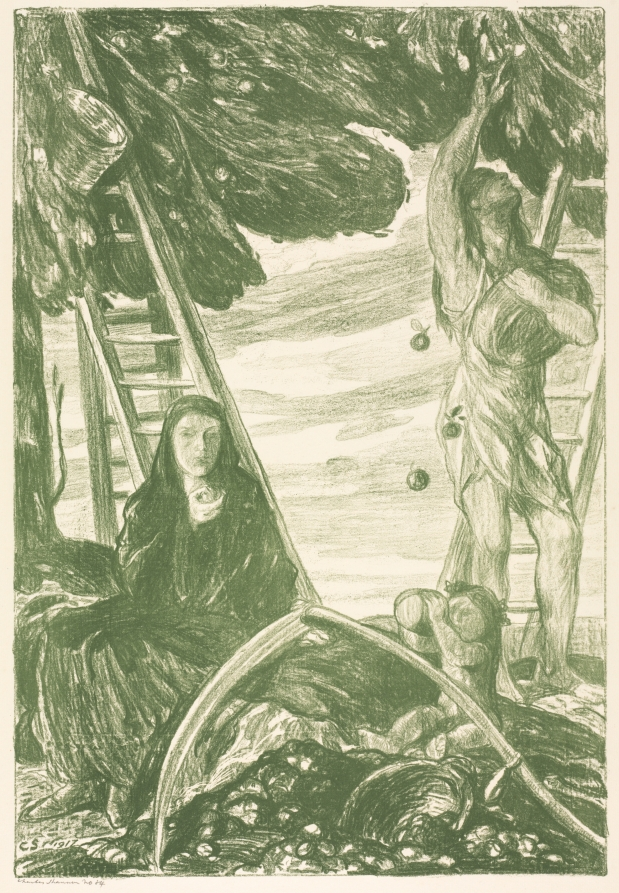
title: Autumn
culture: England, 20th century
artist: Charles Hasslewood Shannon (British, 1863–1937)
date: 1917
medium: lithograph in green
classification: Print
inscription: Lower left, in pencil: "Charles Shannon No. 84" bottom left, in pencil: "Autumn 84/83"